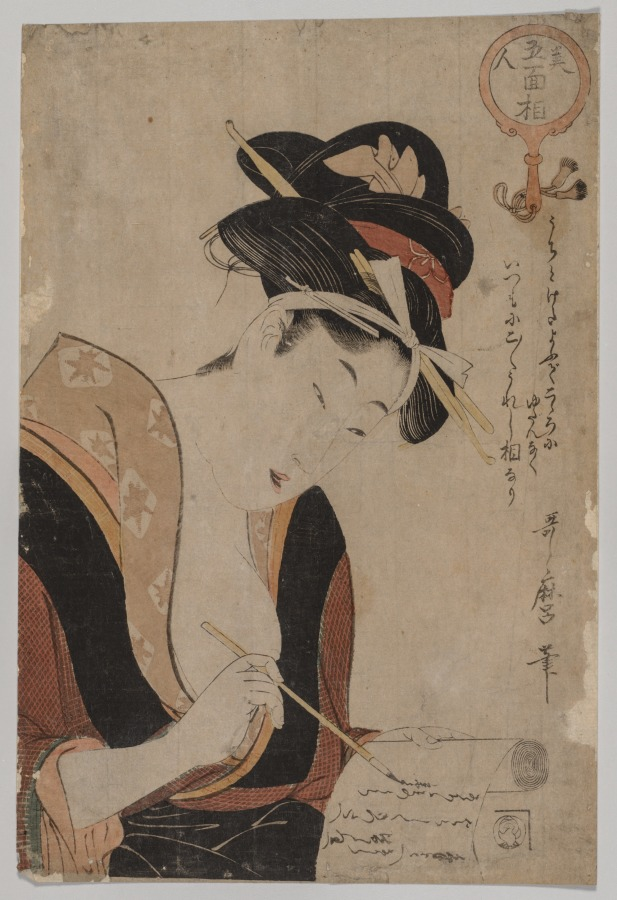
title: Woman Writing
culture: Japan, Edo period (1615–1868)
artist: Kitagawa Utamaro (Japanese, c. 1754–1806)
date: 1753–1806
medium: color woodblock print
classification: Print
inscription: Signature: Utamaro fude Publisher Seal: Tsuruya Kiyeimon